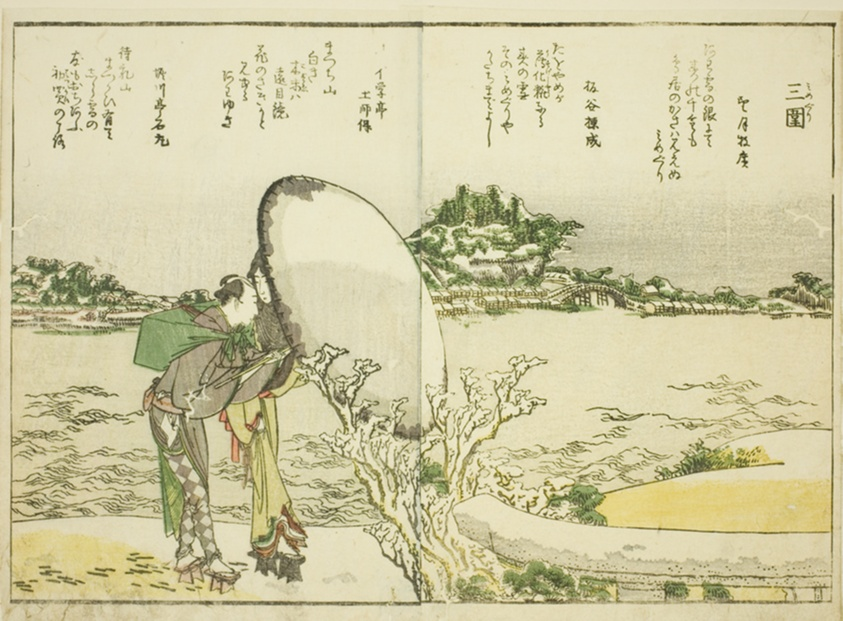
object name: Print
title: Mimeguri, from vol. 1 of the illustrated book "Fine Views of the Eastern Capital at a Glance (Toto shokei ichiran)"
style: Japanese (culture or style)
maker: Katsushika Hokusai 葛飾 北斎; Japanese, 1760-1849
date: 1800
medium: Color woodblock print; double-page illustration from book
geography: Japan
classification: woodblock print; print; asian art